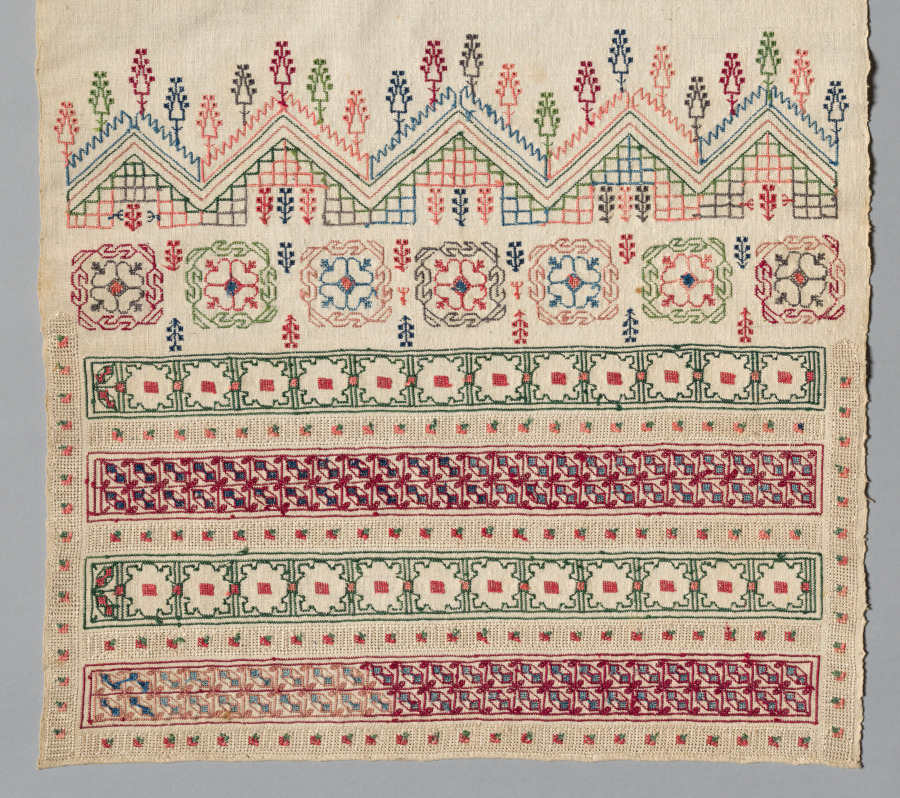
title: Embroidered Towel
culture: Turkey, early 20th century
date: early 20th century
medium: embroidery: silk on cotton tabby ground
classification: Embroidery